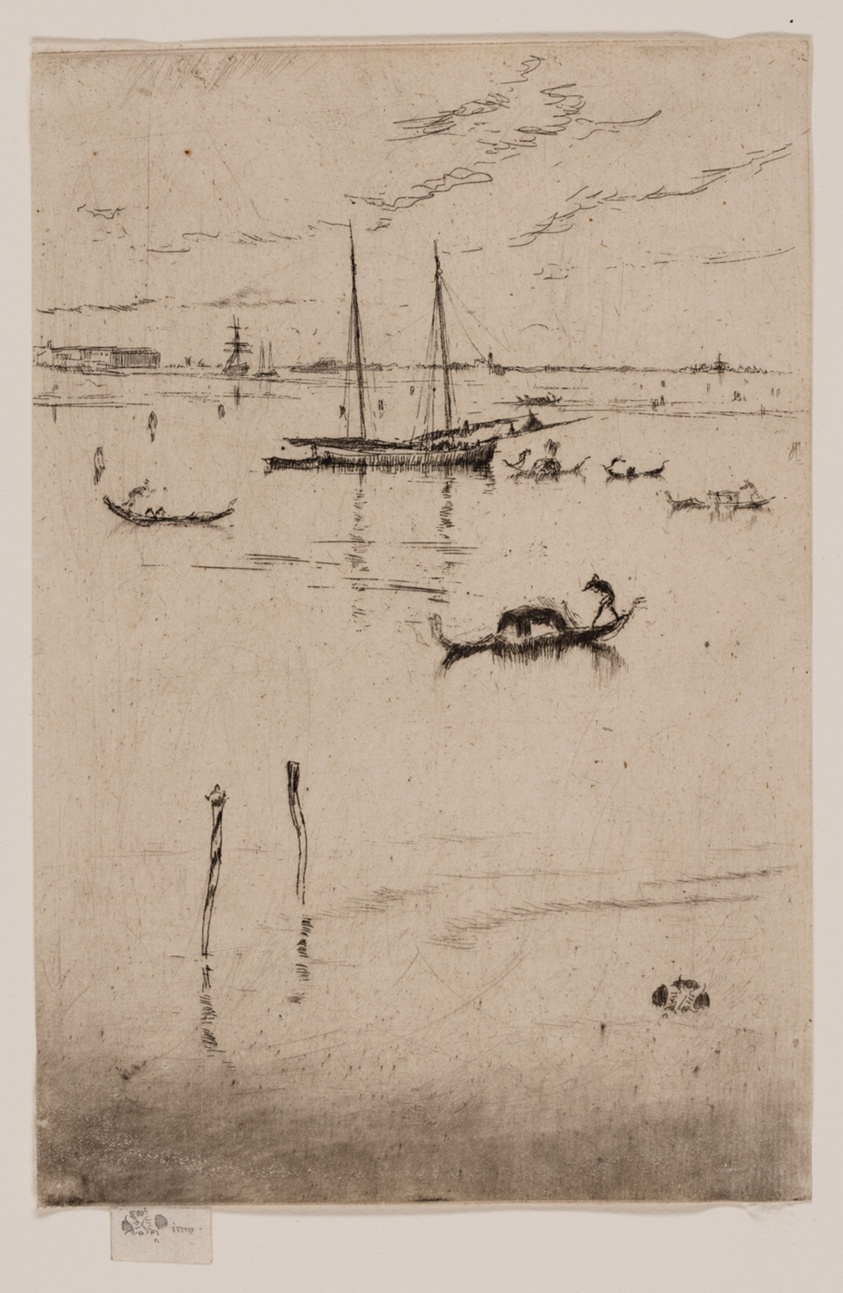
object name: Print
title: The Little Lagoon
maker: James McNeill Whistler (American, 1834-1903)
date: 1879/80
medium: Etching and drypoint with foul biting in black ink on ivory laid paper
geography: United States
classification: etching; foul biting; print; prints and drawing; drypoint; paper